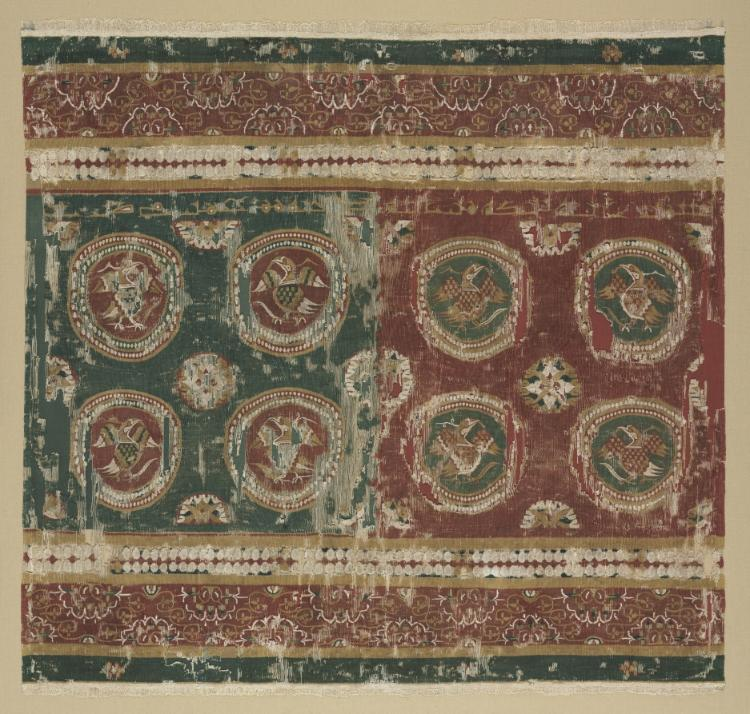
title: Pillow cover with Arabic inscription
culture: Egypt, al-Bahnasa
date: 800s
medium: Wool and linen: tapestry weave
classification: Textile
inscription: "In the name of God. Blessing from God to its owner. Of what was made in the tiraz."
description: This rare complete Egyptian pillow cover is a masterpiece of contrasting colors. Crimson and blue-green wool alternate in the ground and bird-inhabited roundels, supported by mustard-colored wool and undyed linen woven in tapestry weave. When folded down the center, based on examples from Egyptian burials, four birds form a unit on each side and are appropriately ascending in flight. Above, an Arabic text written in angular Kufic script reads, "In the name of God. Blessing from God to its owner. Of what was made in the tiraz." The word tiraz means factory or an Arabic-inscribed textile. This was probably made in al-Bahnasa, the city renowned for colorful wool textiles with figures, as they claimed, from a "gnat to the elephant."